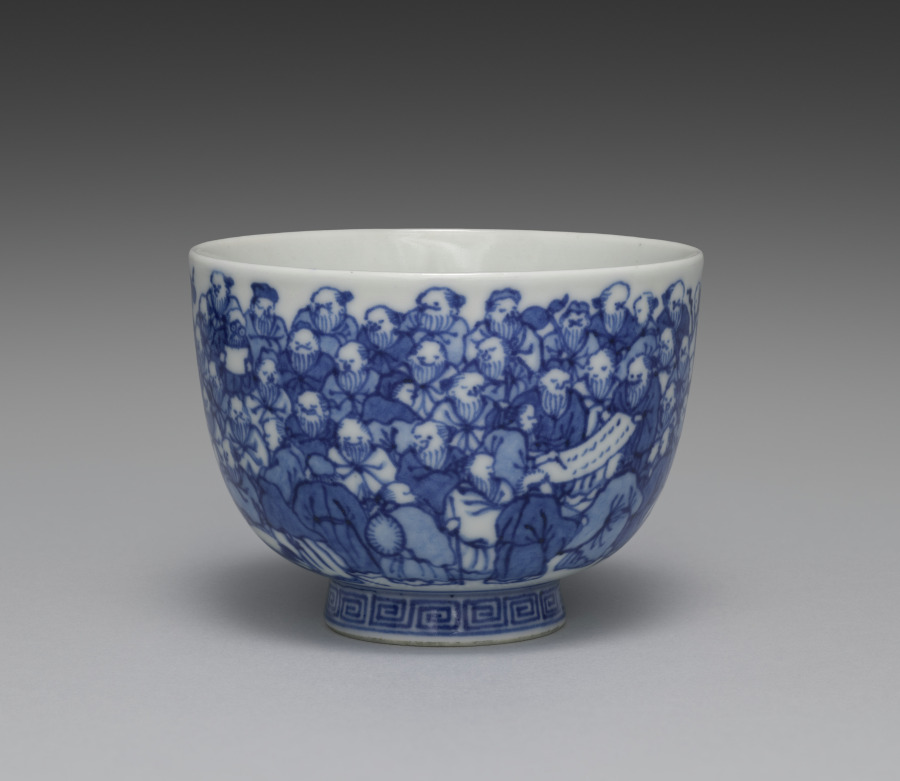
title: Teacup from Teacups with a Hundred Sages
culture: Japan, Meiji period (1868–1912)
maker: Seifū Yohei III (Japanese, 1851–1914)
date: 1893–1914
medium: One from a set of five teacups; porcelain with underglaze blue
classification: Ceramic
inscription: 清風造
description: Each of these five teacups has a painting of identical design in underglaze blue, but as the tiny figures are drawn entirely by hand, each cup has its own personality. The theme of the sencha cups is an assembly of sages or immortals, literally “a hundred venerable [people]” (hyakurō). The myriad figures crowd the scene in groups. The god of longevity, with his tall forehead, sits with his cranes, having flown in from Mt. Penglai on the Isle of the Immortals. Seven long-bearded sages sit around a stone table, chatting and drinking; one is seated on an enormous gourd. Of course, there is a stack of books on the table, and elsewhere, scrolls are being written upon or read—in one case held very close by a sage who is wearing glasses. The design was enormously popular in ceramics made for those engaged in literati culture.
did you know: Seifū Yohei III (1851–1914) produced many works for tea gatherings where people drank Chinese-style leaf-tea (sencha).